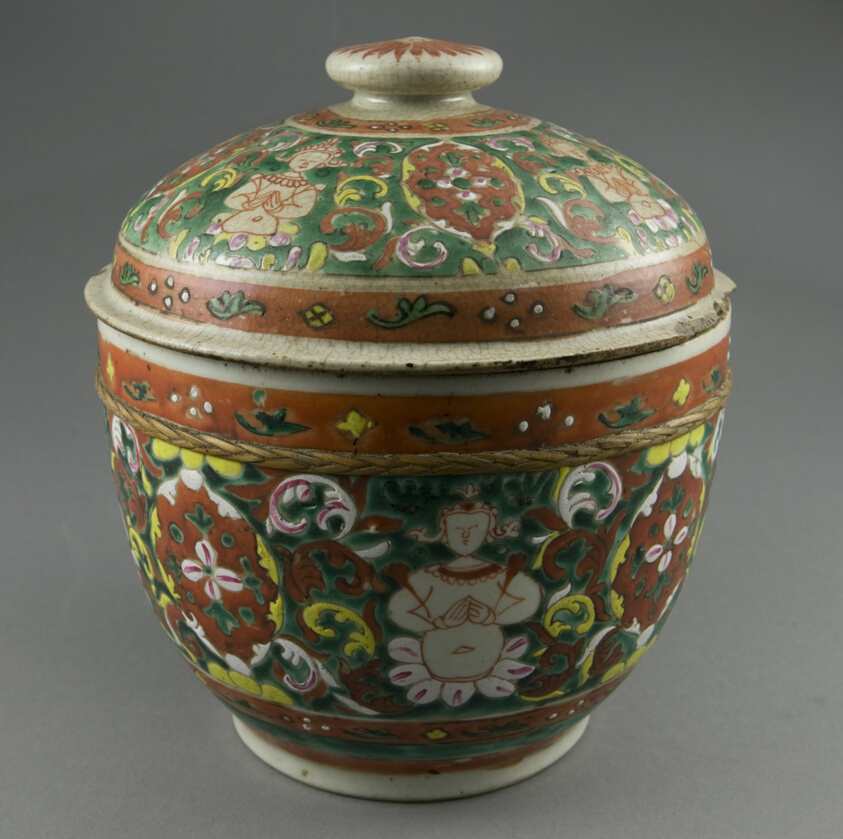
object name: Decorative Arts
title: Bencharong (Five-Colored) Ware, Covered Jar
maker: China, for the Thai Market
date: 19th century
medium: Porcelain painted in overglaze polychrome enamels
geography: China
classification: porcelain; asian art; ceramics; decorative arts